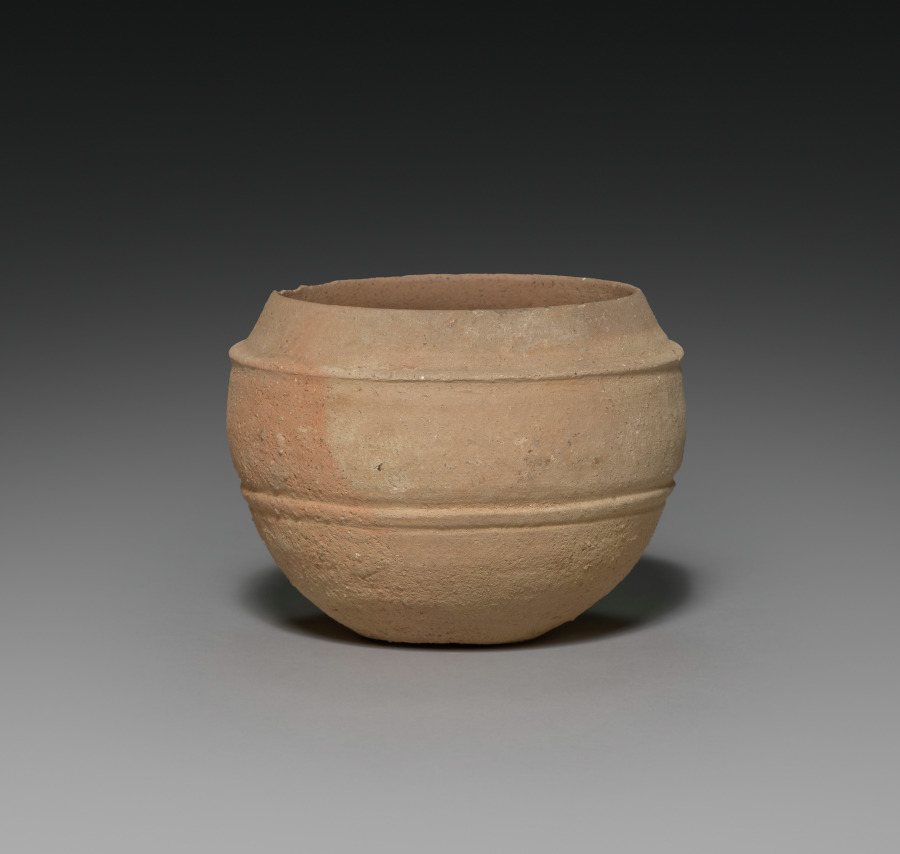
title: Lidded Jar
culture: Korea, Silla (57 BC-935) or Kaya (AD 42-562) period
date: 400s–500s CE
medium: red earthenware with incised band designs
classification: Ceramic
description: Early earthenware from the Three Kingdoms period (57 BCE–668) became widely utilized as agriculture and religion grew to be essential elements in sustaining society and its systems. The clay jars of different sizes and shapes on display were made for the following purposes: some were used to store harvested grains and seeds, some, especially lidded ones such as this, to preserve cremated remains, and some to serve offerings in rituals.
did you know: Closed kilns built on hillsides became widely used for producing this type of pottery vessel in Korea during the Three Kingdoms period.